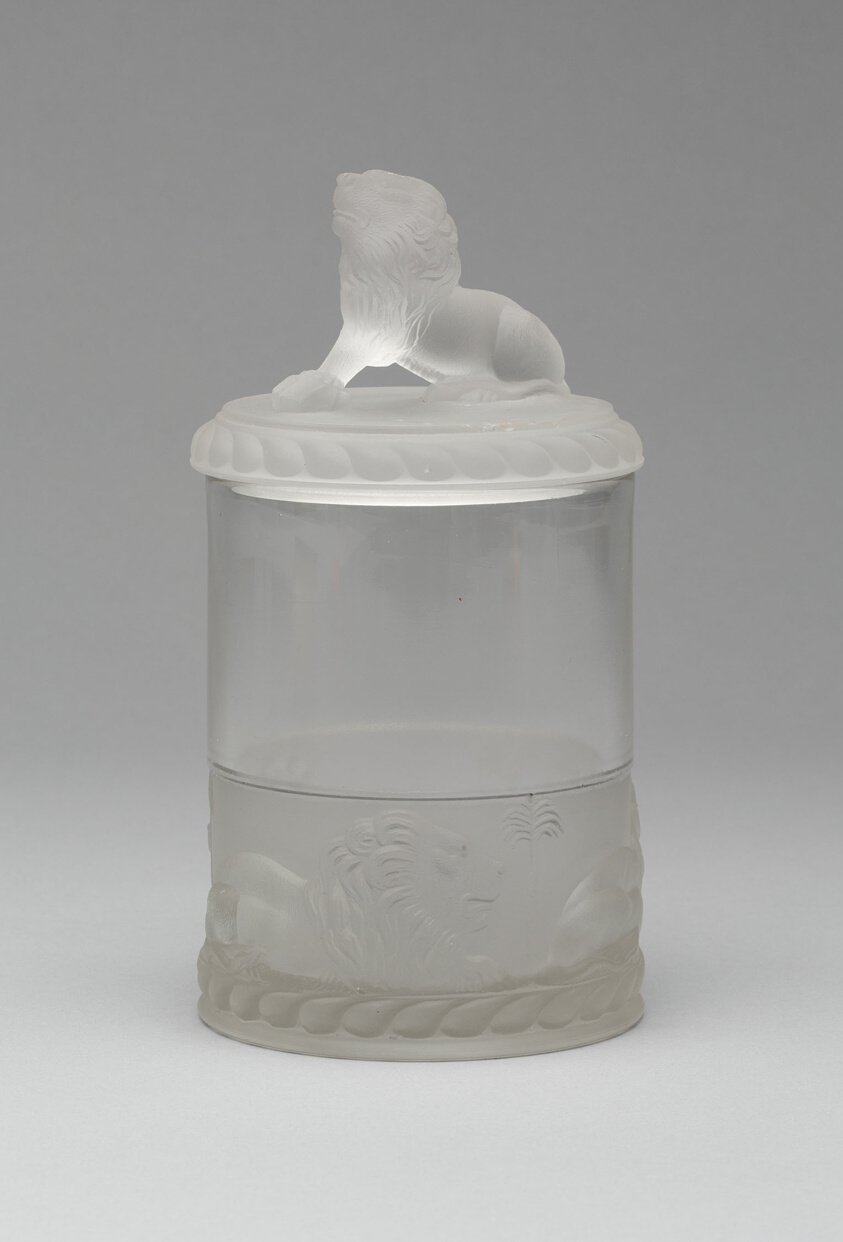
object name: Glass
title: "Lion" covered dish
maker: Artist unknown (American, 19th–20th century)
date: 1870–1900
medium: Glass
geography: United States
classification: dish (vessel); glass; american decorative arts; american arts; decorative arts